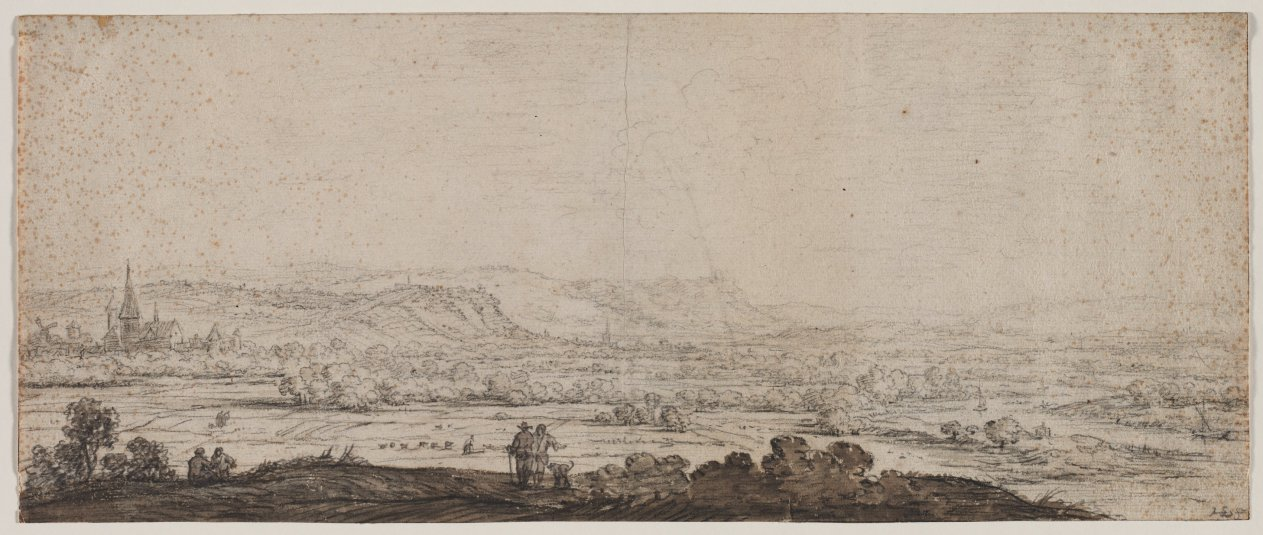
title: Landscape with the Village of Schenkenschanz, Gelderland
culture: Netherlands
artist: Herman Saftleven (Dutch, 1609–1685)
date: 1600s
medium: black chalk and brush and brown wash; framing lines in graphite (top) and black ink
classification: Drawing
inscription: signed, lower right, in black chalk: [artist's monogram: HS] f. ; VERSO, lower right, in brown ink: H. Saftleven / paysage vues genérales / à la plume noire, lavé de bistre / pièce capitale / Vente de A. G. de Visser / 8 Mars 1869. ; lower left, in graphite: Vente Ellinckhuysen / Amsterdam, 16 April 1879: / A[illegible, underlined] ; upper left, in graphite: 3 ; upper left, in brown ink: /3 ; center, in graphite: 313 [associated with collector's mark of Baron Adalbert von Lanna] ; lower left, in brown ink: 19f ; lower left, in graphite: D [12 ?] [12 underlined] due ; lower left, in ink?: 313 [masked] ; lower left, in graphite: n 314 [crossed out twice, partially masked] ; lower left, in ink?: Nº 137. [numerals crossed out, masked] ; lower left, in brown ink: 62[j ?] [crossed out in graphite, partially masked, j added later?] ; lower left, in graphite: [unidentified paraph?] ; lower right, in graphite: 34[illegible, crossed out, partially masked] ; lower right: [illegible, masked]